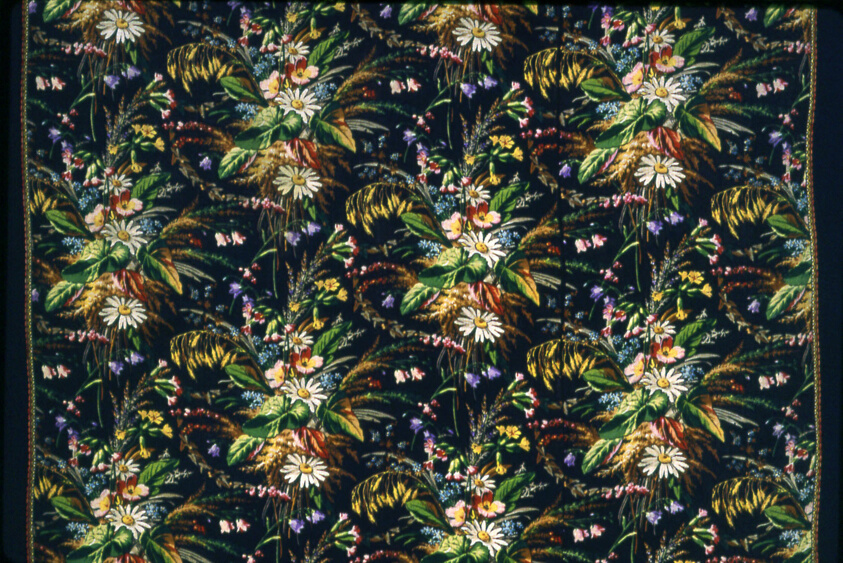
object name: Textile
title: Four Panels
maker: England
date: c. 1850/70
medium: Wool serge; block printed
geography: England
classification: textile; weaving - printed; weaving